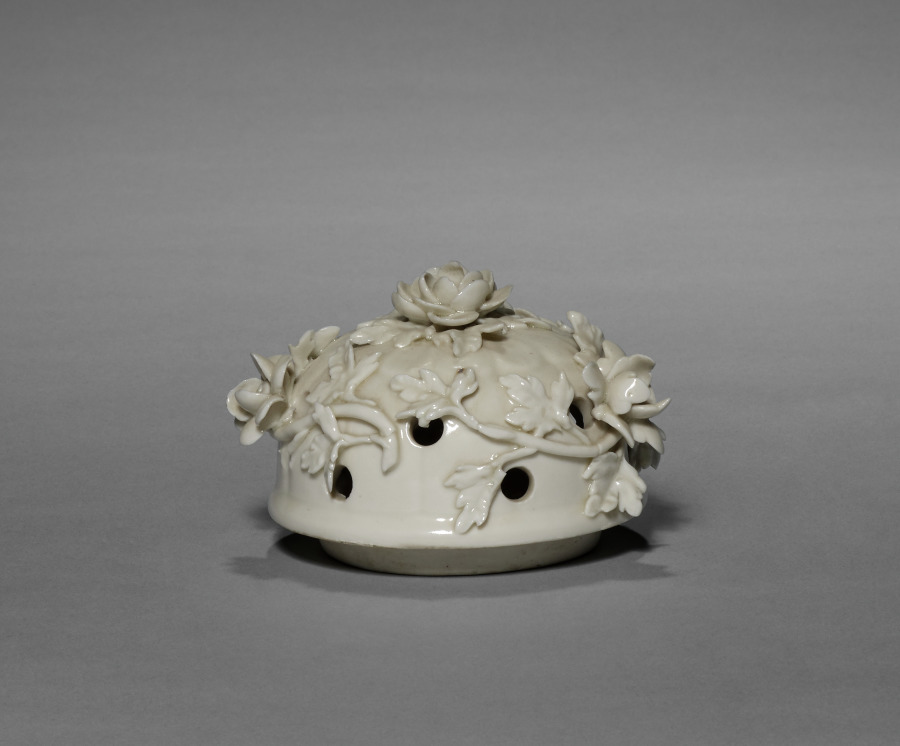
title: Potpourri Vase with Cover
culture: France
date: c. 1860–80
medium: blanc-de-chine porcelain; gilt bronze mount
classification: Ceramic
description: This vase was likely made by the celebrated Parisian ceramics firm of Edmé Samson (1810-91). To cater to the resurgence in taste for 18th-century designs, the Samson firm specialized in making reproductions of rare 18th-century European porcelains, especially those from firms that had already copied Chinese porcelains. In this case, this vase's design is taken from models produced by the St. Cloud factory in the 1750s after earlier Qing dynasty Chinese ceramics. However, the telltale sign that this vase is made by Samson and not St. Cloud is that the original would have been made from a soft-paste porcelain (fired at a lower temperature), while this example is made of hard-paste porcelain (fired at the highest temperature).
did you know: Potpourri vases always have holes in the top to let the scent of dried spices and flowers contained within freshen the air around them.